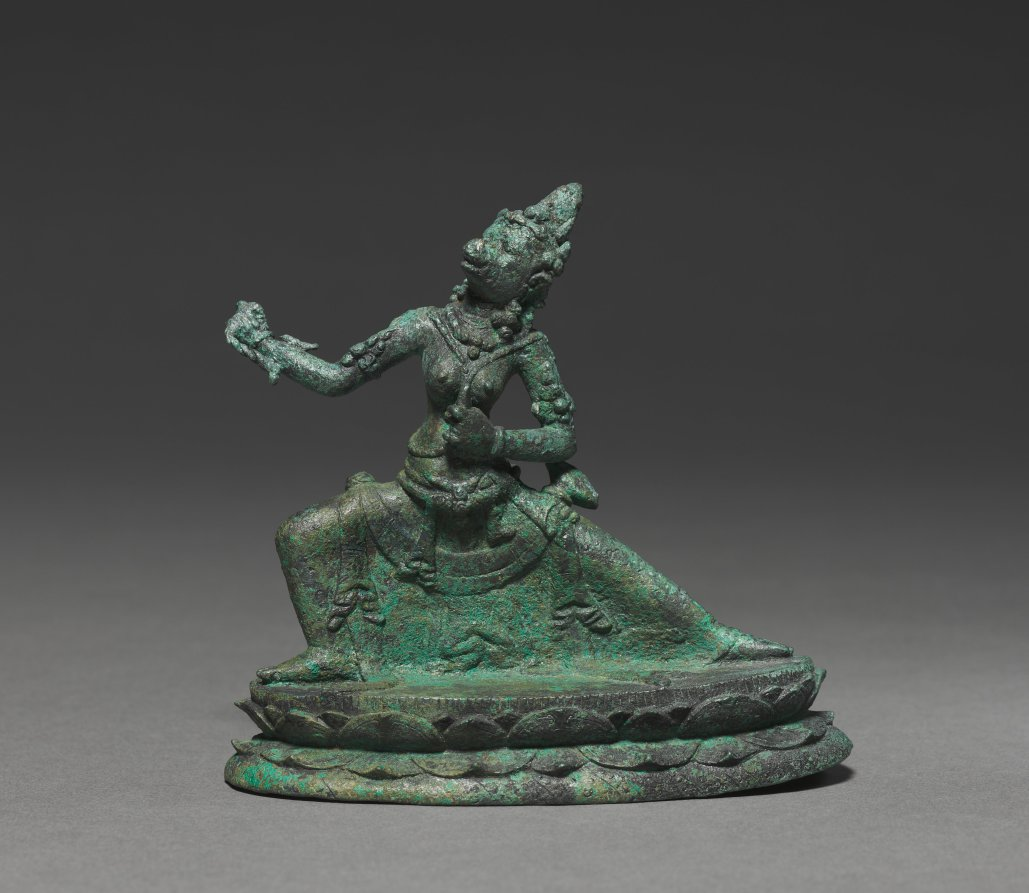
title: Varahi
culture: Java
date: 800s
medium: bronze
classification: Sculpture